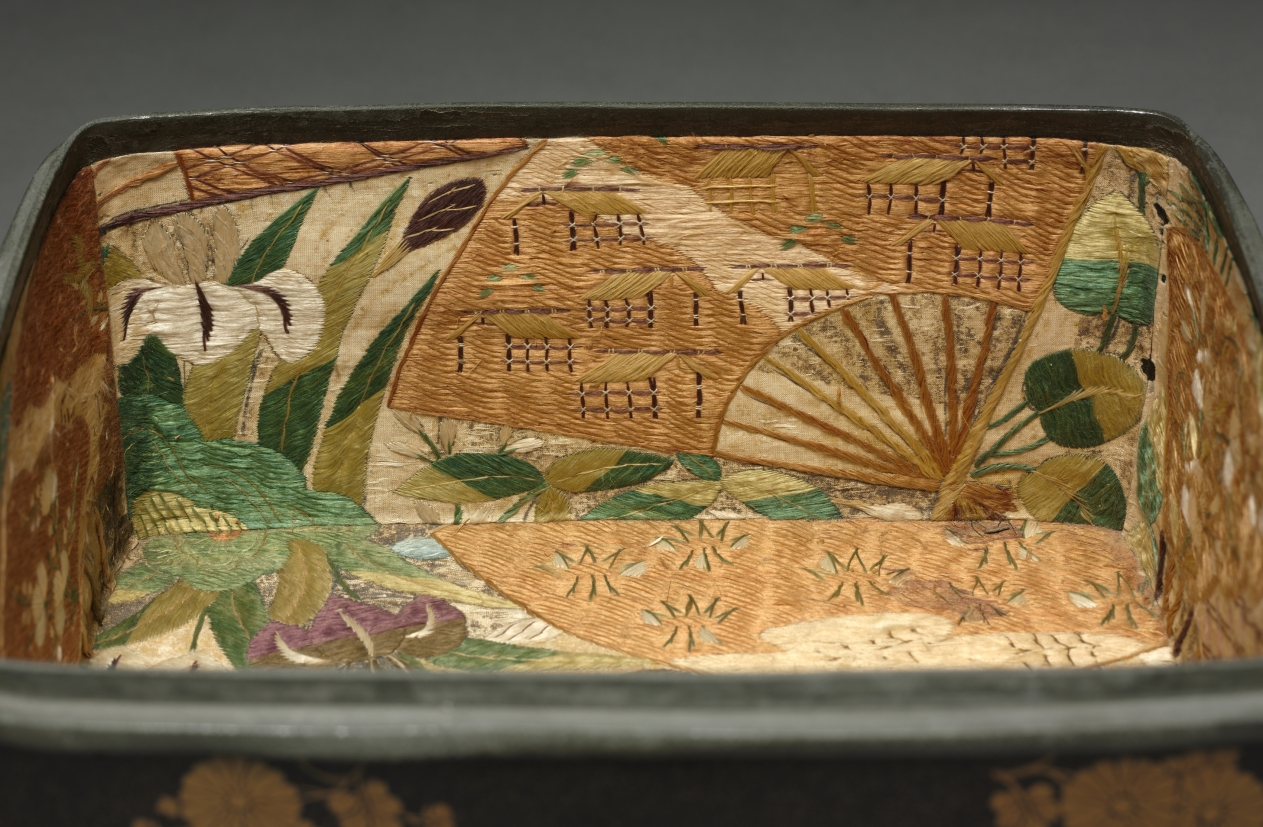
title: Cosmetics Box with Chrysanthemums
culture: Japan, Kamakura period (1185–1333)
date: early 1300s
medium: lacquer on wood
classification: Lacquer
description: In China, the chrysanthemum was historically appreciated for its association with the Double Nine Festival and the reclusive life of the poet Tao Yuanming (AD 365-427). In Japan, the 16-petaled chrysanthemum came to symbolize the Japanese imperial family after Emperor Gotoba (1180-1239) chose the motif as his personal emblem, having it applied to his sword and everyday utensils. This box proves that the flower also appeared on lacquer wares as early as the Kamakura period.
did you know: In Japanese, this type of small box is called a tebako, literally a hand box, and was typically part of a cosmetics set.